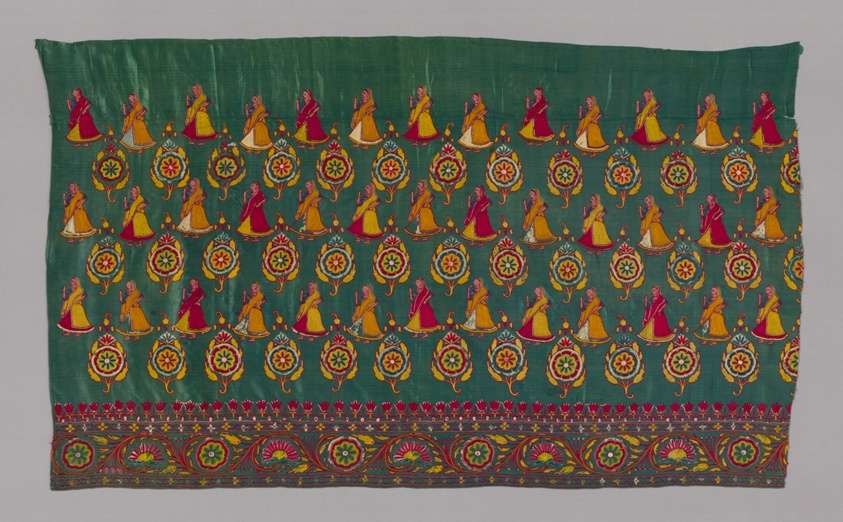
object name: Costume and Accessories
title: Part of a Skirt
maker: India, Kutch, Gujarat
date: Late 19th century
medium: Silk satin; embroidered in silk chain stitch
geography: India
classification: textile; needlework (visual works); weaving; costume; skirt (garment)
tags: women, dancers, dancing, flowers